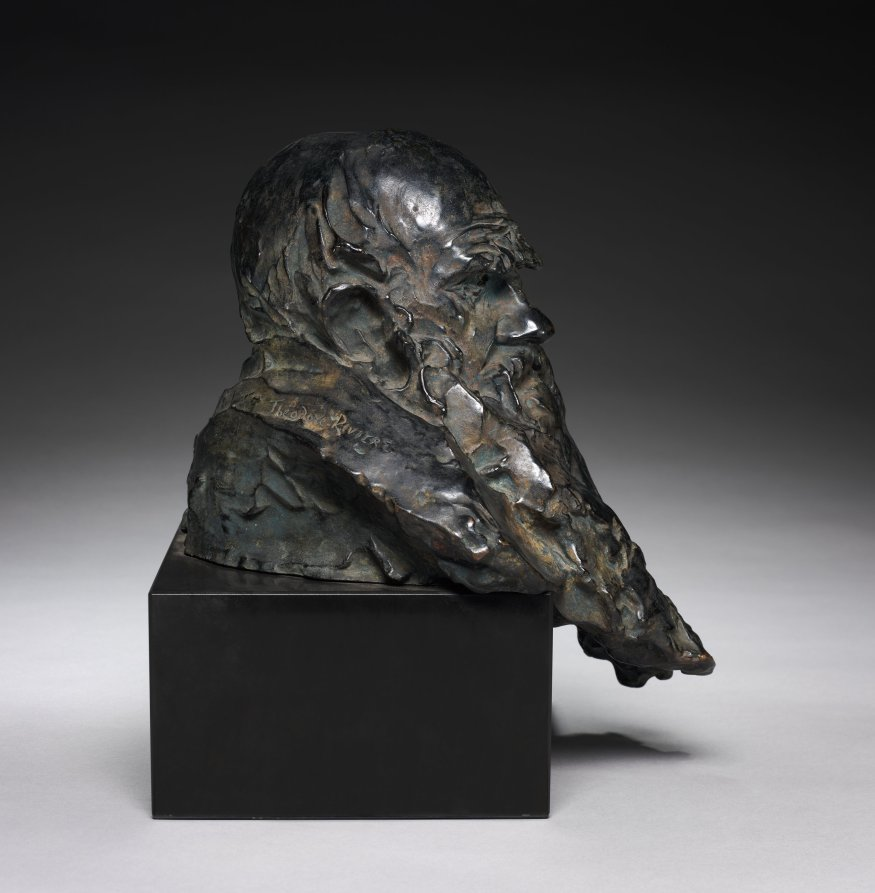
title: Bust of Tolstoy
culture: France, late 19th-early 20th century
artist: Théodore Rivière (French, 1857–1912)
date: d. 1985 – 1905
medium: bronze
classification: Sculpture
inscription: Signed on back of shoulder to left: "Theodore Riviere"